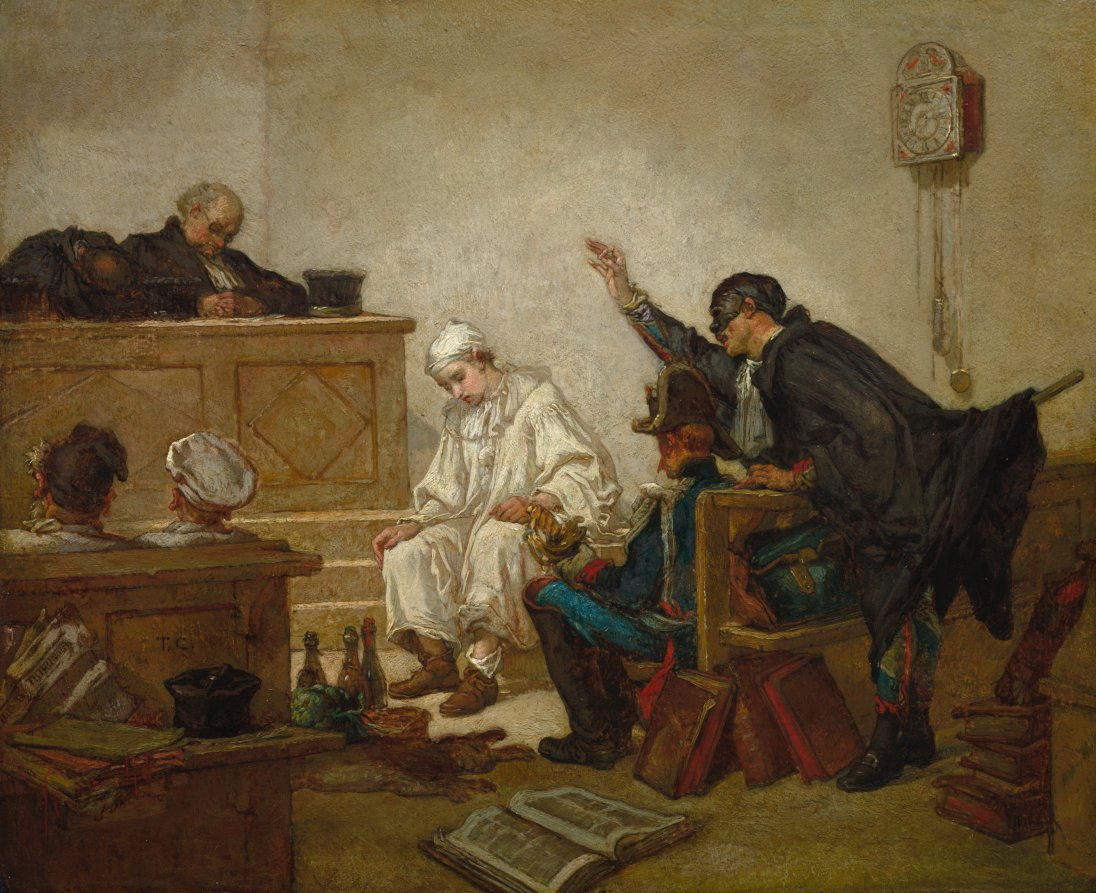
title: Pierrot in Criminal Court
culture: France, 19th century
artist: Thomas Couture (French, 1815–1879)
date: c. 1864–70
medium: oil on wood panel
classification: Painting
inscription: Signed left on the back of the bench: t.c.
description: In this painting, Couture used two famous masked characters, Pierrot and Harlequin, to satirize and critique the public and the judicial system of the 19th century. The pathetic Pierrot represents a lower-class fool on trial for stealing food from a restaurant. The stolen items are depicted lying on the courtroom floor as an indictment of his guilt. His accusers sit on the left, while Harlequin, his lawyer, argues theatrically for the defense. The artist's contempt for the legal profession and the court system is plain in the figures of the sleeping judges. A mid-19th-century observer may have sympathized with Pierrot, who for his own survival cunningly subverts authority in order to satisfy his needs.